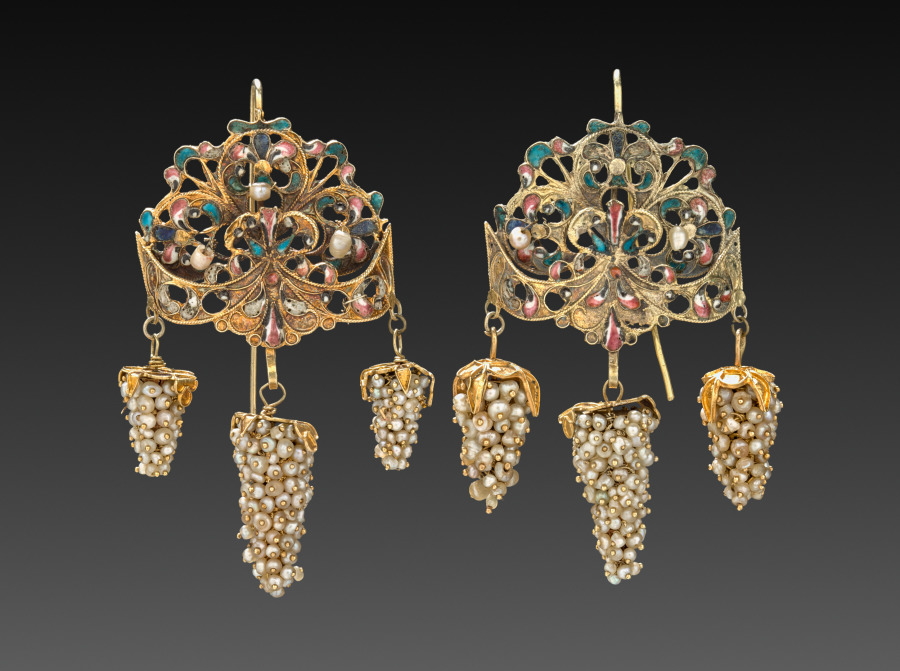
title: Pair of Earrings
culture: Italy, Naples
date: 1700s–1800s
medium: gold and enamel with pearls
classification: Jewelry